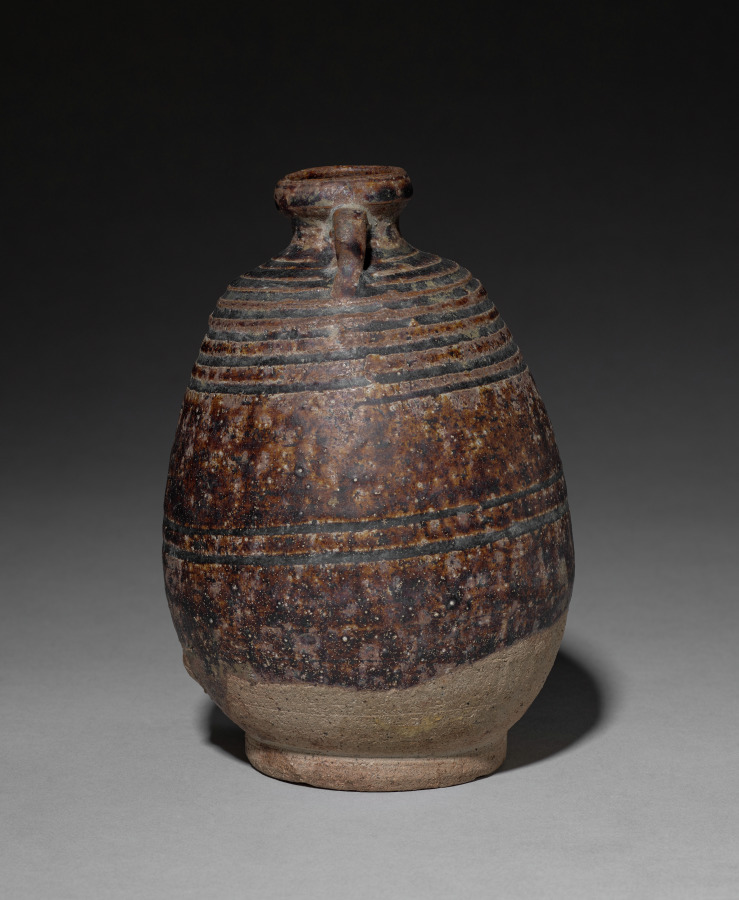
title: Bottle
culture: Siam, Sawankhalok ware, late 13th-14th Century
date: late 1200s-1300s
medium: stoneware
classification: Ceramic